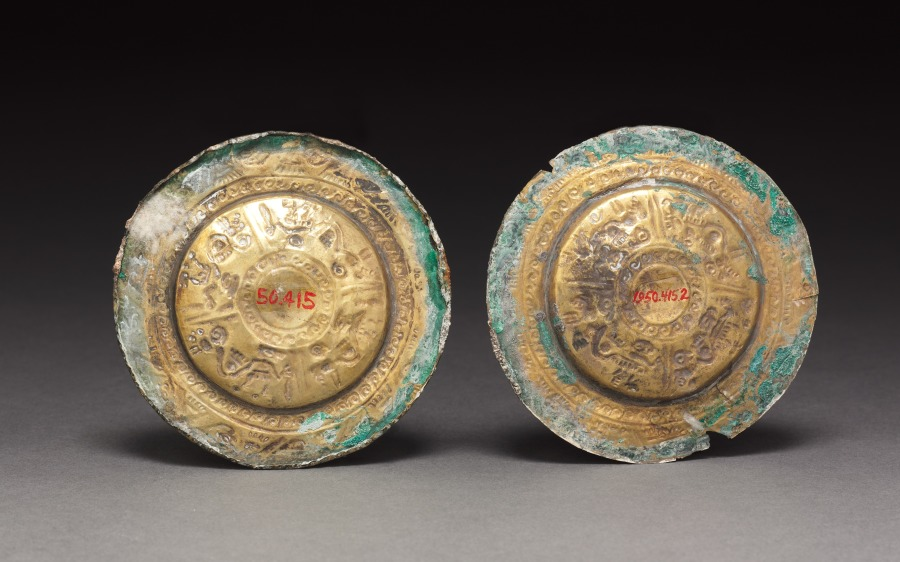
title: Pair of Ear Ornaments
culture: Peru, North Coast, Sicán, 9th-14th century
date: c. 800–1370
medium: hammered and embossed gold alloy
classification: Metalwork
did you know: Wearing large ear ornaments, a privilege of the nobility, permanently stretched the earlobes.